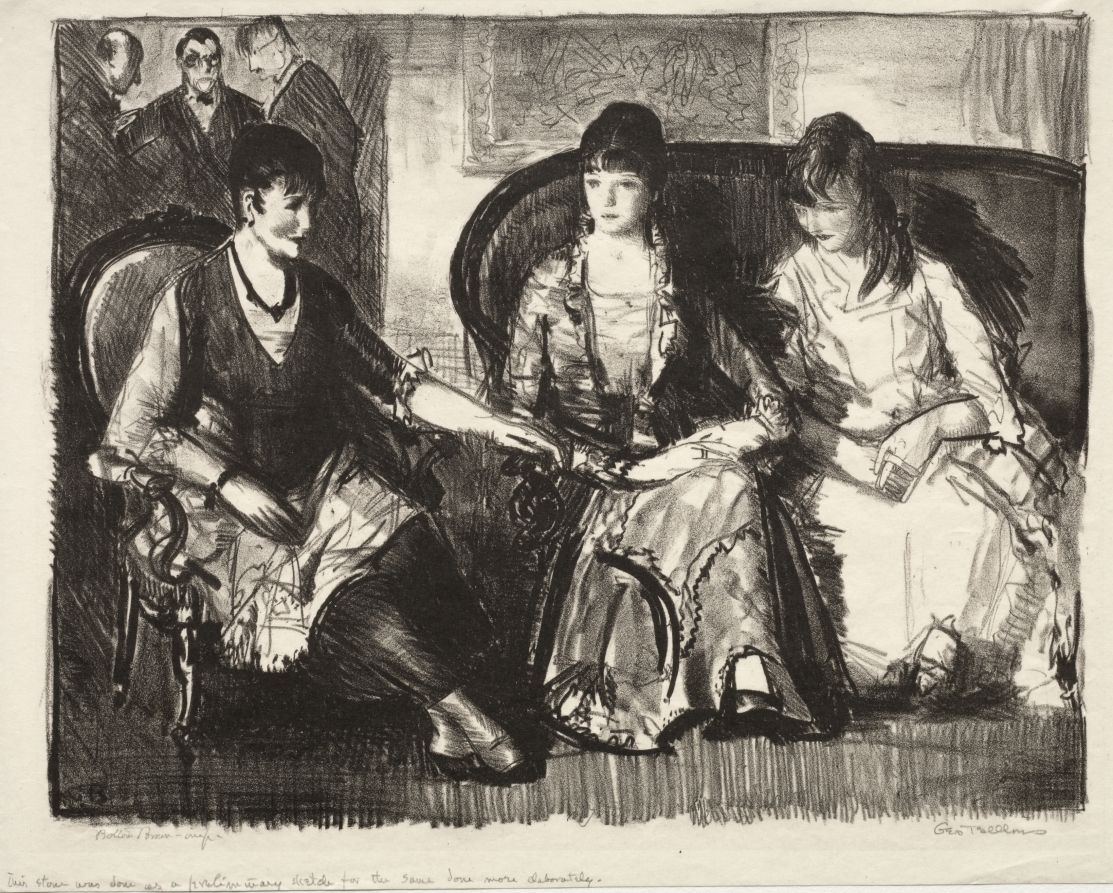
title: Elsie, Emma and Marjorie, First Stone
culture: America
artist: George Bellows (American, 1882–1925)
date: 1921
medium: lithograph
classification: Print